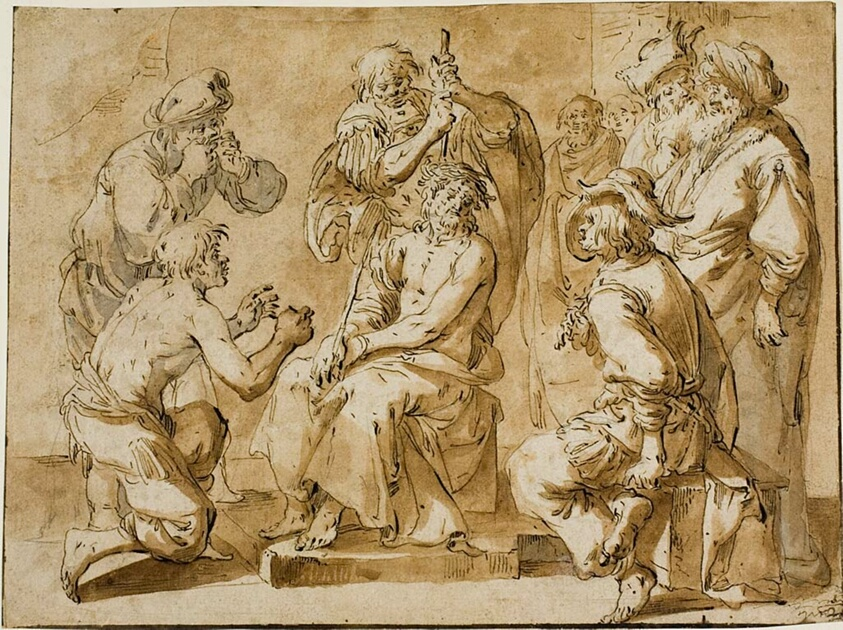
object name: Drawing and Watercolor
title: The Mocking of Christ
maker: Andries Dirksz Both; Dutch, 1611-1641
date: 1633/35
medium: Pen and brown ink with brush and brown and gray wash, over traces of black chalk, on ivory laid paper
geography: Holland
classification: ink or chalk wash; drawings (visual works); prints and drawing